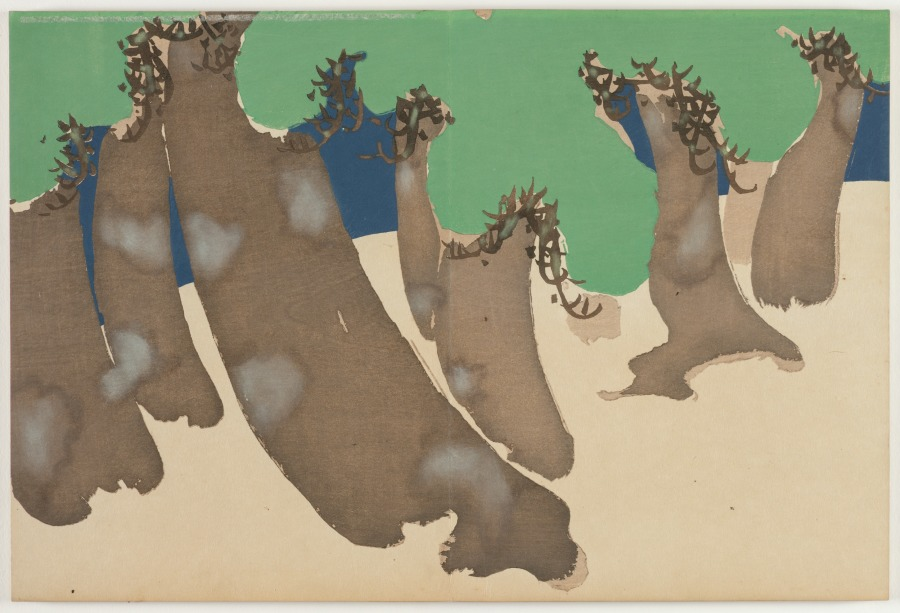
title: Flowers of a Hundred Worlds (Momoyogusa): Windswept Pines (Sonarematsu)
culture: Japan, Meiji period (1868–1912)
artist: Kamisaka Sekka (Japanese, 1866–1942)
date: 1909–10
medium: color woodcuts with gold and silver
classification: Bound Volume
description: This print from a set of three woodblock printed albums displays the graphic design prowess of Kamisaka Sekka. The images were first distributed one by one to subscribers to the series but later were reissued in bound form, like this book, for mass consumers. Each print features a vignette taken from nature or Japanese literature. Many of the scenes have a long history in Japan, originating in the 900s or 1000s and having been interpreted by all manner of artists since that time. Sekka’s selections hew closely to precedents from the Rinpa style originated by painter Tawaraya Sōtatsu (c. 1570–c. 1640) and calligrapher Hon’ami Kōetsu (1558–1637).